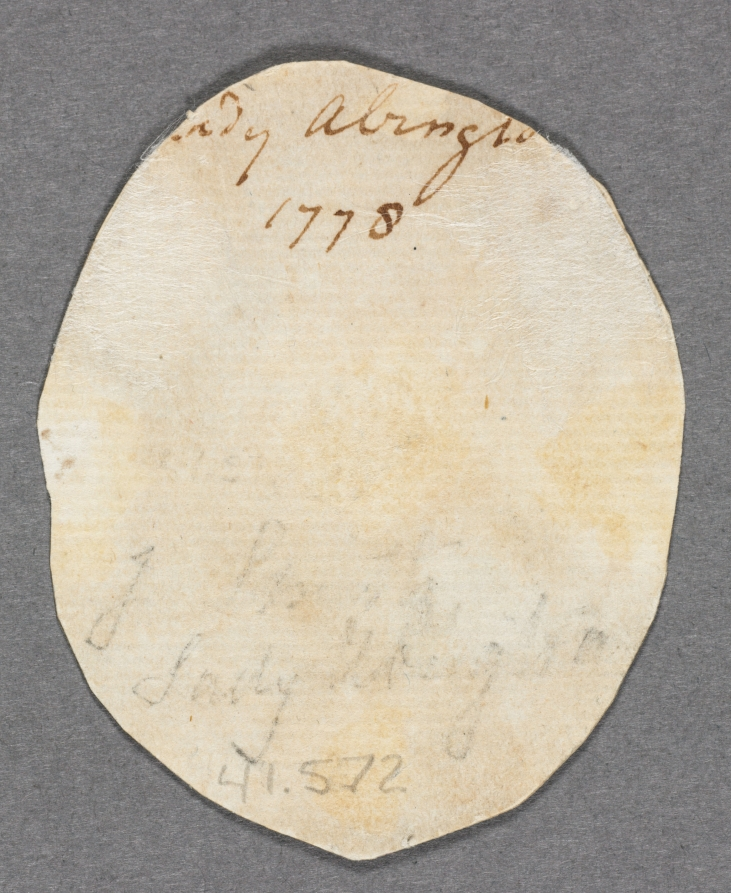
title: Portrait of Charlotte Bertie, née Warren, 4th Countess of Abingdon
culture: England, 18th century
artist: John I Smart (British, 1741–1811)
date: 1778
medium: graphite and wash on laid paper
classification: Portrait Miniature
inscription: inscribed on verso of paper to top in brown ink: [L]ady Abingto[n] 1778; inscribed at bottom of verso in graphite: J Smart / Lady Abington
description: Although it is impossible to say if it was always part of the artist’s process to execute a preparatory sketch prior to painting each miniature, we do know that John Smart retained many hundreds of these sketches. A group of preparatory sketches—of which this portrait is one—descended through the Smirke family after Smart’s daughter Sarah gave a sketchbook containing preparatory portrait studies to her friend Mary Smirke, sister of the celebrated Victorian architect Sydney Smirke. This book was probably broken up around 1877 when it was divided between Sydney’s daughters Mary Jemmett and Mrs. Lange, whose portions were both sold at auction in 1928. G. C. Williamson was the first to suggest that Smart’s sketches were well known and that they were preparatory studies for the painted miniatures. Williamson listed the names of sitters from the sketches known to him at the time, and they included Lady Abingdon. Here, Lady Abingdon’s head and shoulders face right. Her brown hair is dressed high on her head, and a strand of pearls is woven through the left side of her coiffure. A veil descends from the top of her head, past her shoulders. She has gray eyes. Compared to his contemporaries George Engleheart (1752–1829) and Andrew Plimer (1763–1837), whose female sitters were often painted in similar simple white gowns, Smart often lavished more attention on the costumes in his portraits of women, whose dresses incorporated colored silks, printed fabrics, and luxury trimmings like lace and fur. Thus, Lady Abingdon wears a low-necked, pink dress trimmed with ermine and strands of pearls. The background is unpainted. The removal of the paper backing revealed an inscription in brown ink, written in Smart’s hand, dating the work and verifying the identity of the sitter as Lady Abingdon. Lady Abingdon (d. 1799) was the daughter of Admiral Sir Peter Warren, K.B., M.P. She married Willoughby Bertie, 4th Earl of Abingdon, in 1768. They had six children, two of whom died very young. It is for Lady Abingdon that Abingdon Square in New York City is named, courtesy of her father, who had purchased 300 acres of land in Greenwich Village in 1744. Her husband’s famous protestations against the British government’s treatment of America during the War for Independence ensured that even in 1794, when the New York city council was rooting out British names from public streets and spaces, the name of Abingdon Square was retained. The family was painted by some of the great artists of the day, including Nathaniel Dance-Holland (1735–1811) and John Francis Rigaud (1742–1810). The formal portrait of 1769 by Dance-Holland, in which Lady Abingdon is depicted in coronation robes and holding her peeress’s coronet, conveys the pomp and tradition expected from a marriage portrait of a powerful peer. But even Smart’s miniature portrait sketch of almost a decade later maintains some of this grandeur, depicting the countess with aristocratic bearing and wearing the rich ermine-trimmed gown to which her station entitled her. A miniature on ivory corresponds to this preparatory sketch, although it is dated 1777, suggesting that the sketch may have been executed the following year in preparation for a second version of the portrait. There are slight differences in the details of the dress, particularly the left sleeve—which has been lengthened—and a slight reduction in pearl and ermine trim. The portrait on ivory also has somewhat more softness in the facial features, but many of the details, including the veil and the lock of hair on the right shoulder, are extremely similar. The miniature’s current location is unknown.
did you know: Sketches helped John Smart work out the particulars of a portrait before commencing the miniature on ivory, and they were useful in the event that a duplicate might later be required.